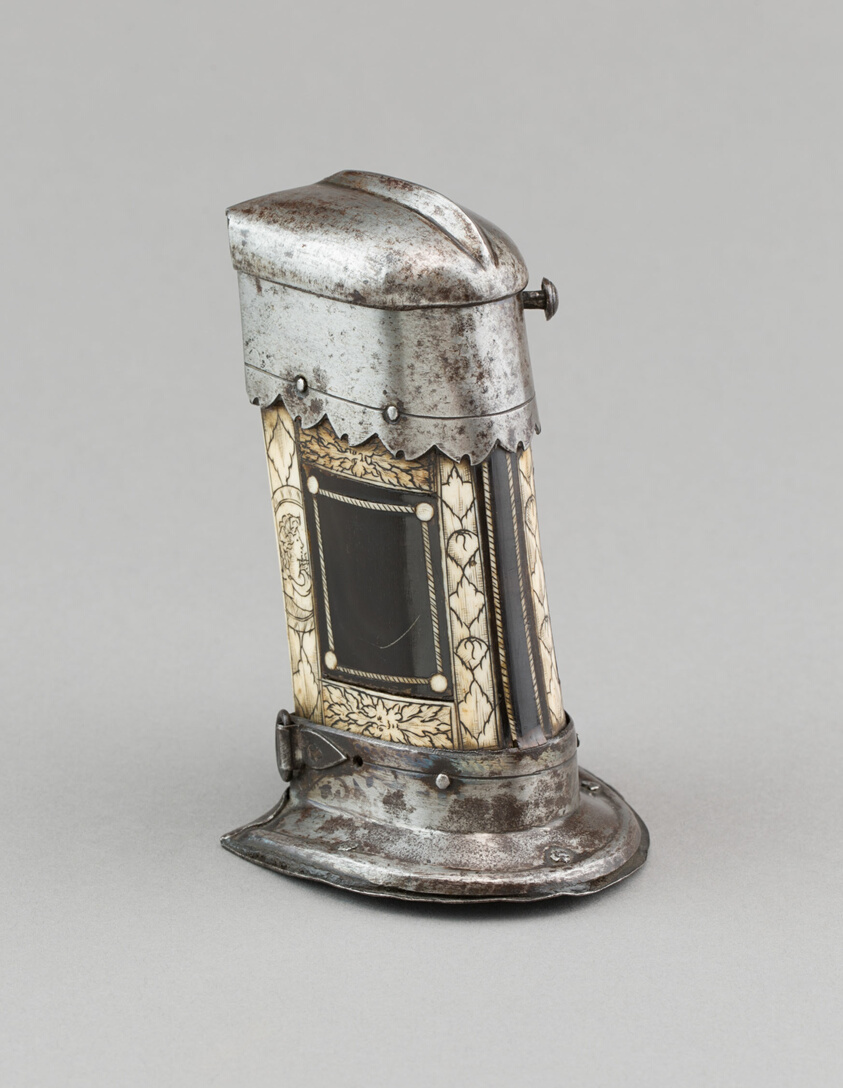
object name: Arms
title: Cartridge Box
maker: German, Saxony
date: late 16th century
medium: Wood, ebony, bone, and iron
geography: Saxony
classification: firearm-accessory; arms; arms and armor